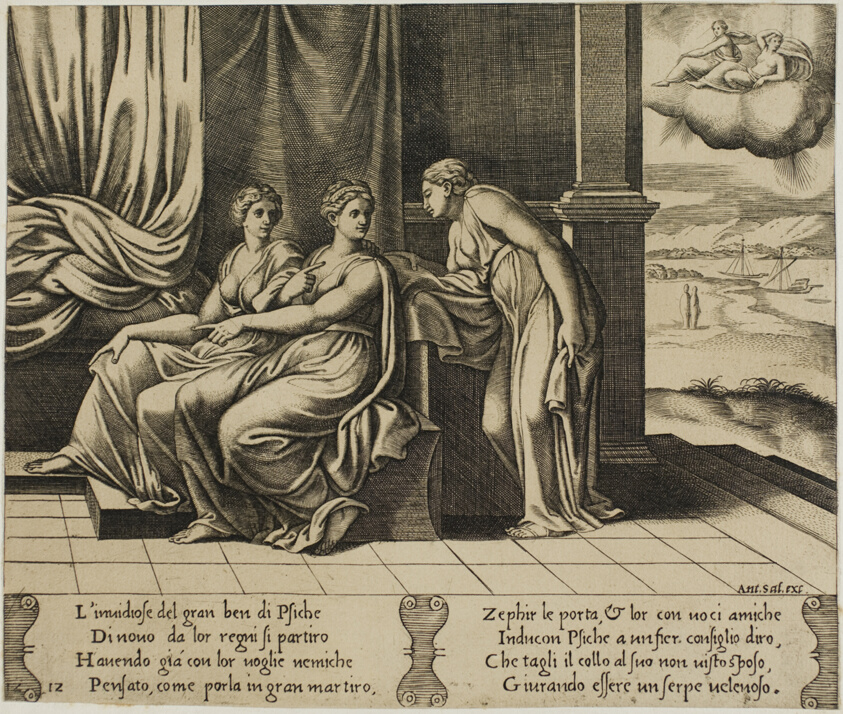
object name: Print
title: Psyche's Sisters...Persuade Her that a Serpent is Sleeping with Her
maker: Master of the Die (Italian, active c. 1530-1560); after Michiel Coxcie I (Flemish, 1499-1592); in turn, inspired by Raffaello Sanzio, called Raphael (Italian, 1483-1520)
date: 1530/40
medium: Engraving in warm brown ink on light brown laid paper, laid down on cream laid paper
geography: Italy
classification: engraving; print; prints and drawing